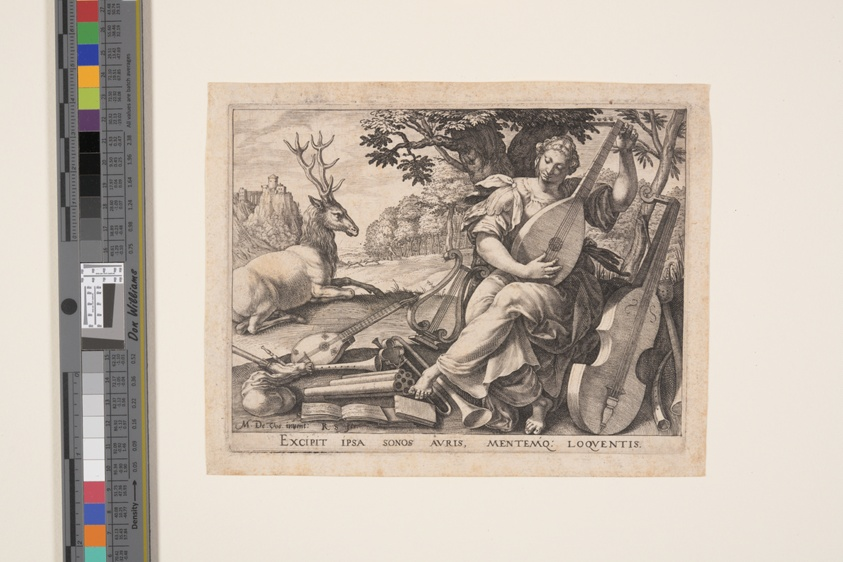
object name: Print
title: Hearing, from The Five Senses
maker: Raphael Sadeler I (Flemish, 1560/61–1628/32); after Maarten de Vos (Flemish, 1532–1603)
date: 1581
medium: Engraving on paper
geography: Flanders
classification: engraving; paper; print; prints and drawing